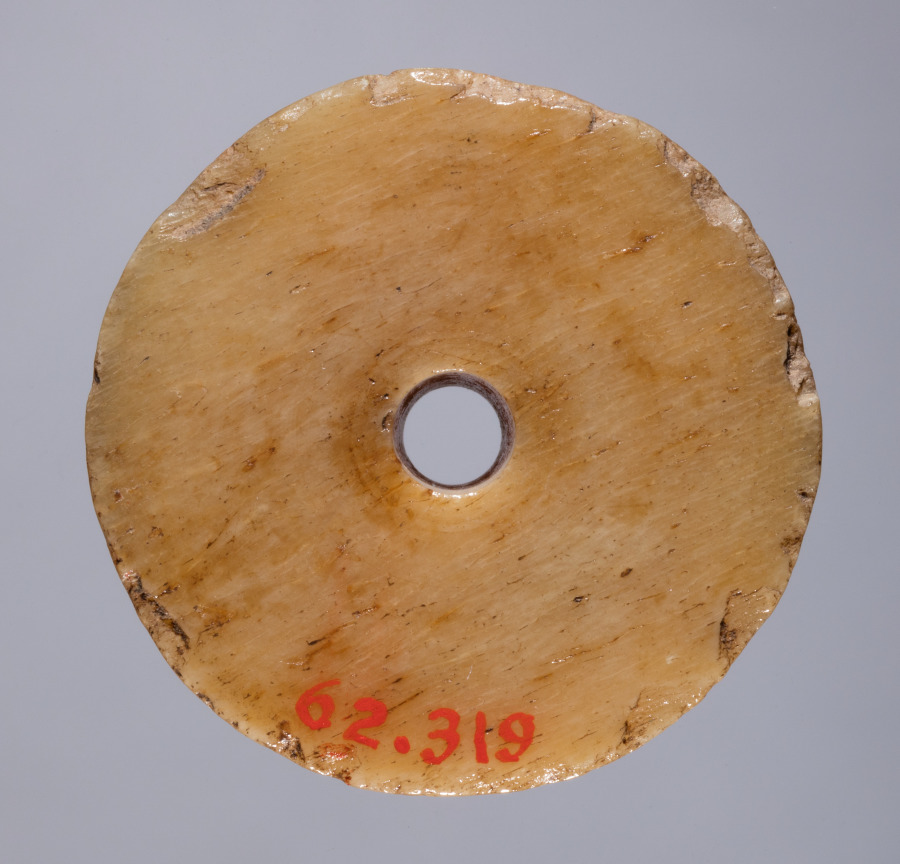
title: Spindle Whorl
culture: Iran, early Islamic period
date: 700s - 900s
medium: bone, incised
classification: Spindle Whorl